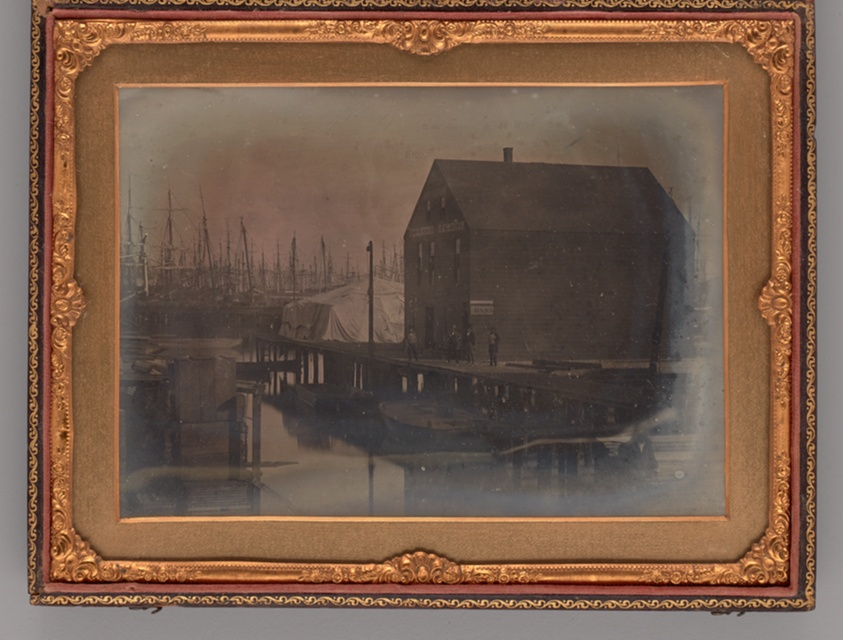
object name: Photograph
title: Untitled (Warehouse on Wharf)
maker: Unknown maker; American, 19th century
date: 1850-1855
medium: Daguerreotype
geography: United States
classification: portrait; daguerreotype; portrait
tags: lundberg collection